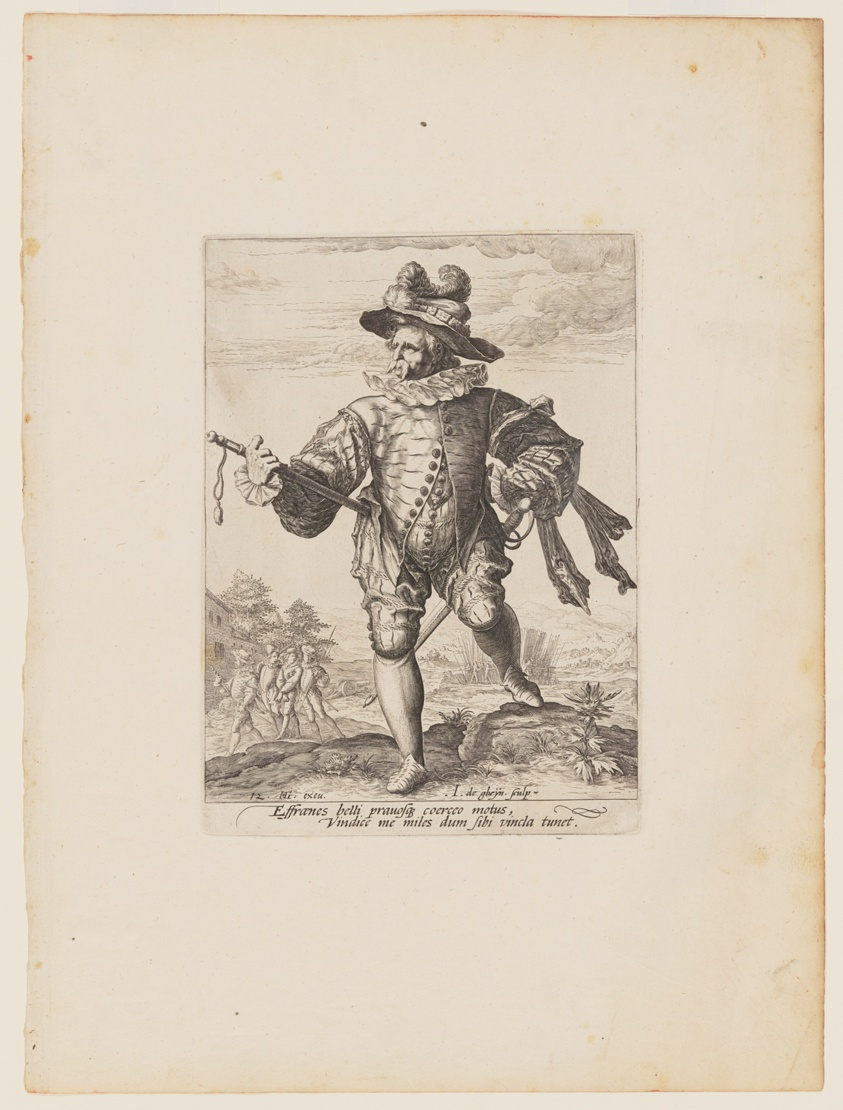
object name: Print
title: Provost, from Officers and Soldiers of the Bodyguard of Emperor Rudolph II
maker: Jacques de Gheyn II (Dutch, 1565–1629); after Hendrick Goltzius (Dutch, 1558–1617)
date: 1587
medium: Engraving on ivory laid paper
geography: Netherlands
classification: engraving; paper; print; prints and drawing